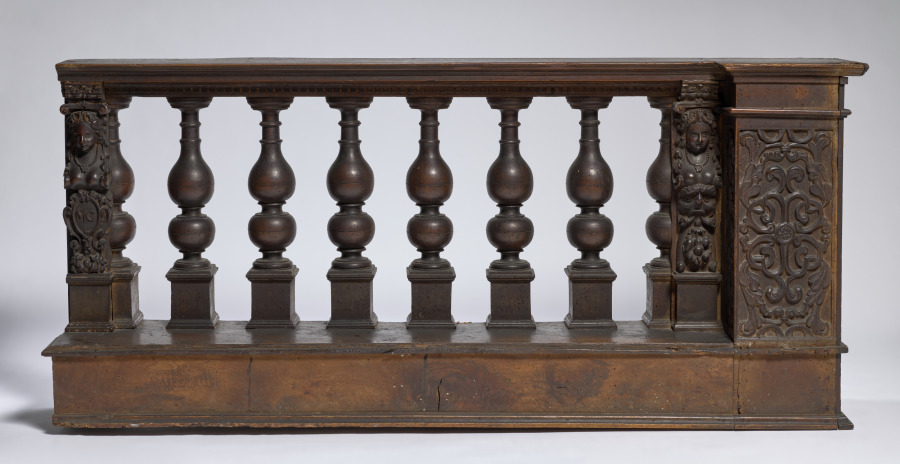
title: Balustrade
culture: Italy, 17th century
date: c. 1630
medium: carved and turned walnut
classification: Furniture and woodwork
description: This balustrade, or railing, was probably intended for use in a private house, perhaps to set off a bed alcove.